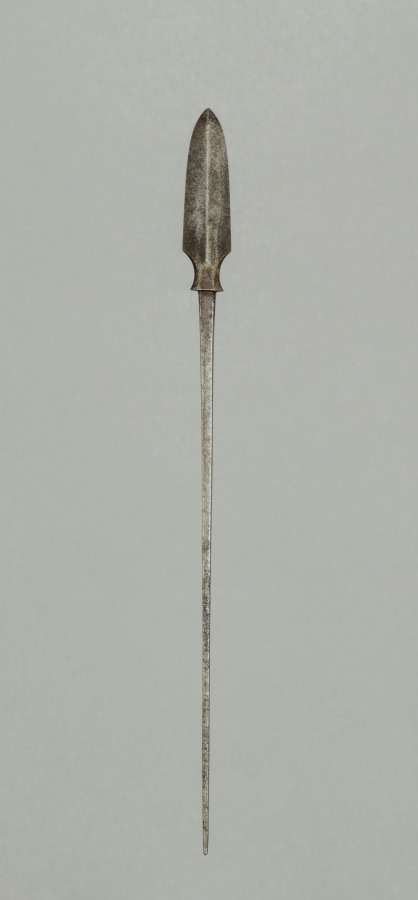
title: Arrow Point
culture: Japan, Edo period (1615–1868)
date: 1700s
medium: steel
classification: Arms and Armor